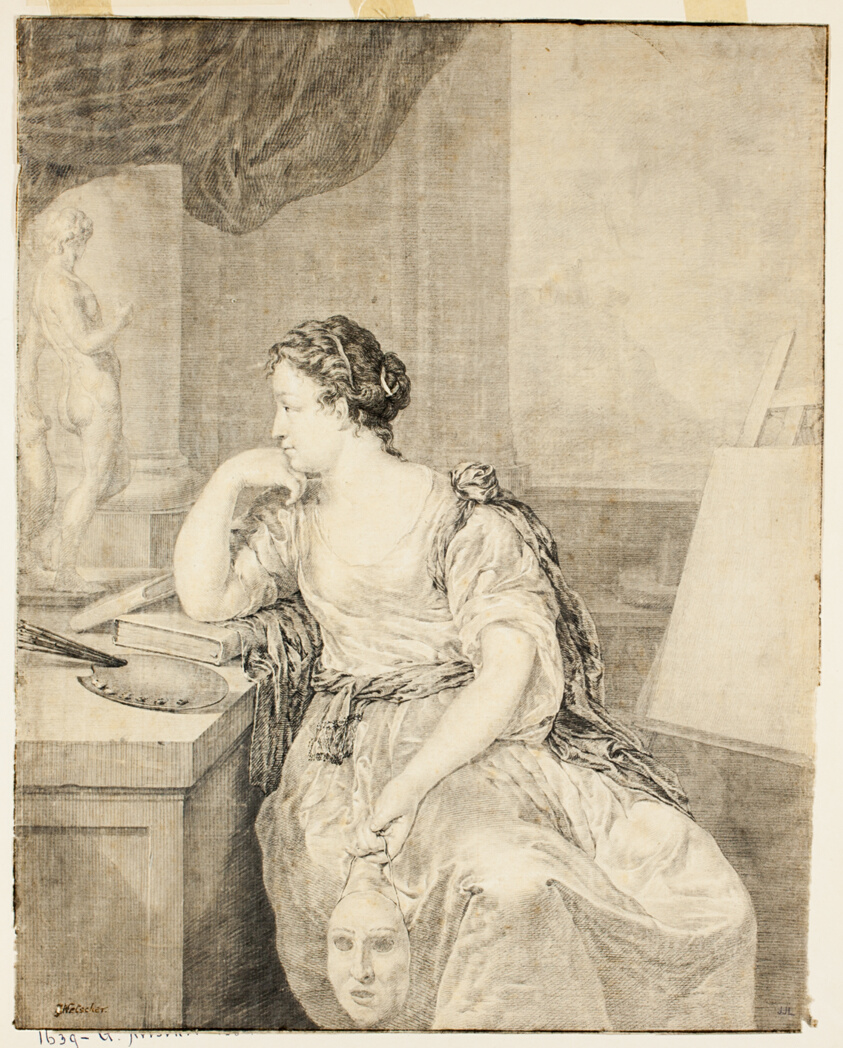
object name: Drawing and Watercolor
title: Portrait of Madame de Poullain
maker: After Caspar Netscher; Dutch, 1639-1684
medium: Drawing on paper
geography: Holland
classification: drawings (visual works); prints and drawing